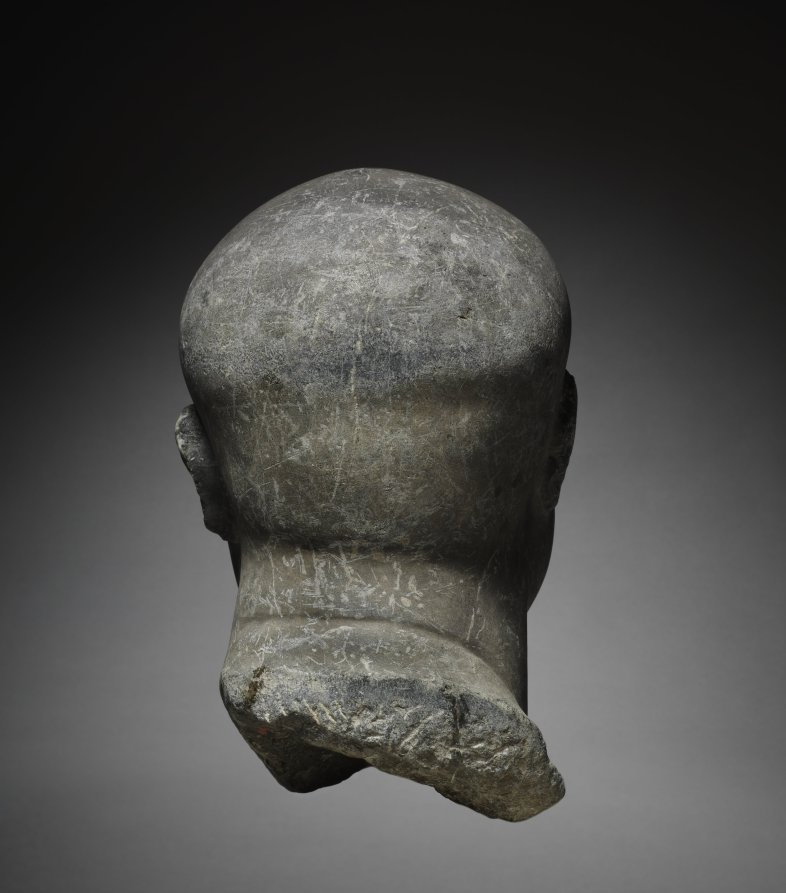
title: Portrait Head of a Priest of Isis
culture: Italy, Roman style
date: 100–200 CE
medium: limestone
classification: Forgery